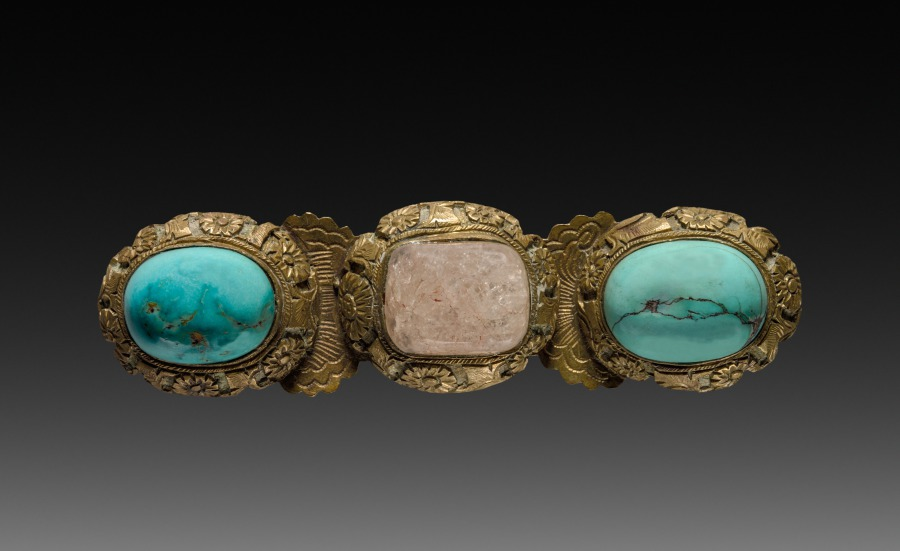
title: Buckle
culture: China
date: 1900s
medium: matrix and crystal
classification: Jewelry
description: Belts with buckles made of precious material were accessories for men of higher social status.